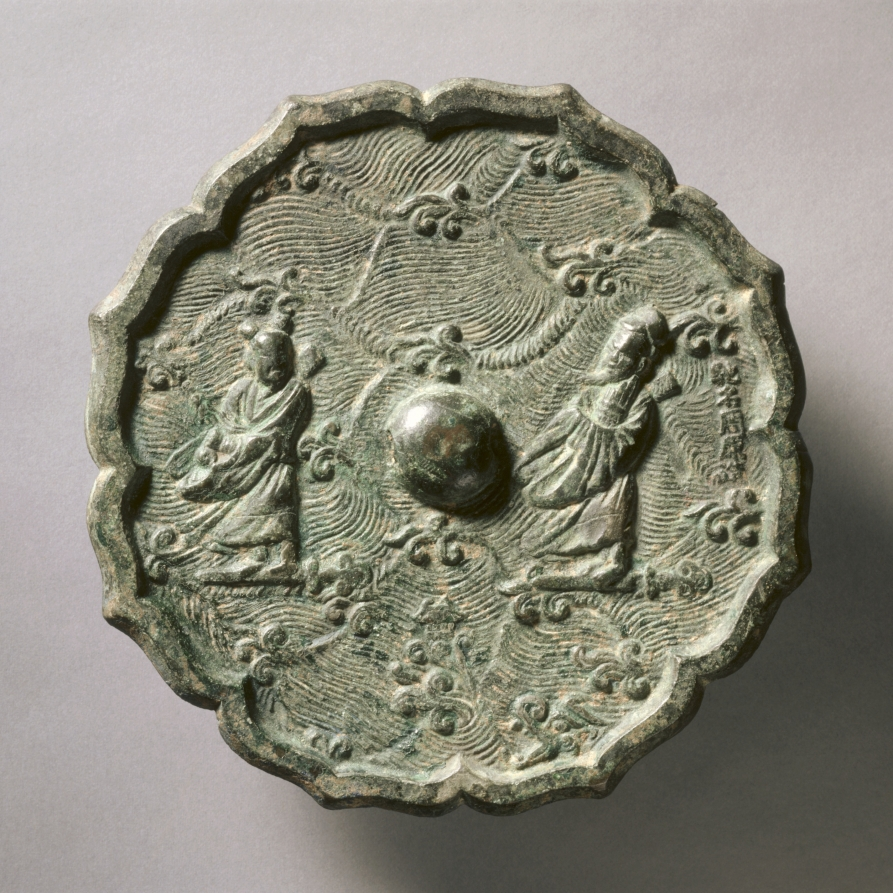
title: Octafoil Mirror with Two Immortals Crossing the Ocean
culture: China, Song dynasty (960-1279)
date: mid-900s–late 1200s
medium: bronze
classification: Metalwork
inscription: Made by the famous Zhou Yuan.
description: This mirror in the shape of a flower represents two immortals crossing the ocean, surrounded by surging waves. The younger figure on the left wears two buns on his head; the elder one with a long beard is carrying a musical instrument, sheng. The scene may illustrate “The Eight Immortals Crossing the Ocean,” in which their supernatural power to walk on water is depicted. The two men here stand on their swords to travel on water. In Daoist and Buddhist thinking, swords are considered powerful, magical implements to exorcise demons and destroy evil spirits.